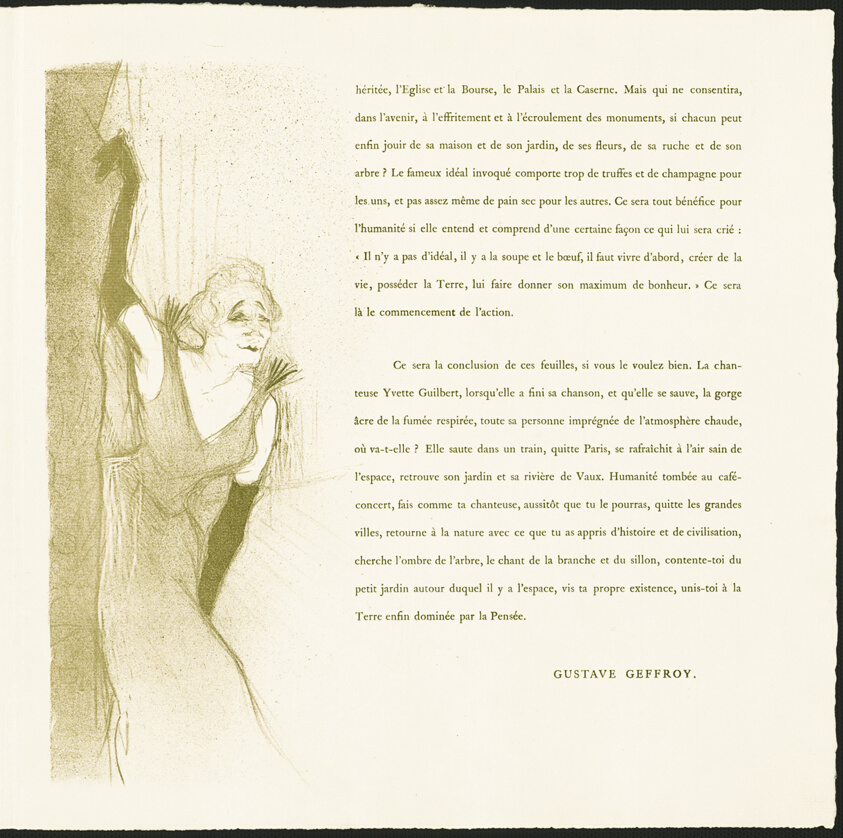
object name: Print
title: Yvette Guilbert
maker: Henri de Toulouse-Lautrec (French, 1864-1901)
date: 1894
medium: Color lithograph, with letterpress, on ivory laid paper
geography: France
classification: lithograph; print; prints and drawing